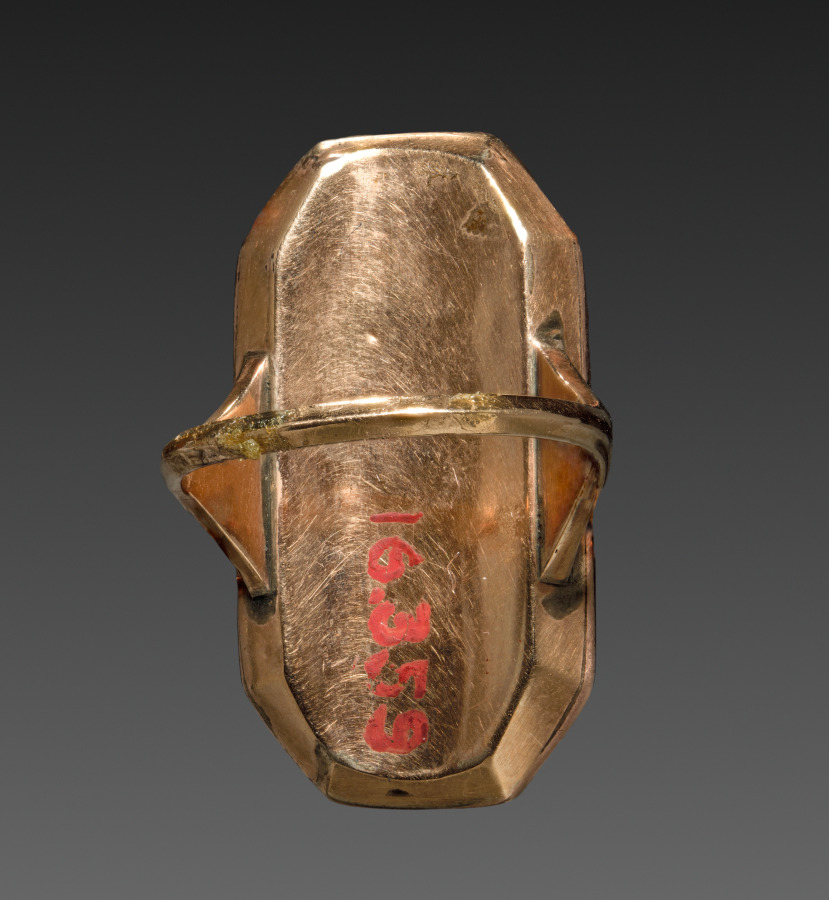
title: Miniature Ring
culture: France, 19th century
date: 1800s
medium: miniature mounted in gold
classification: Jewelry